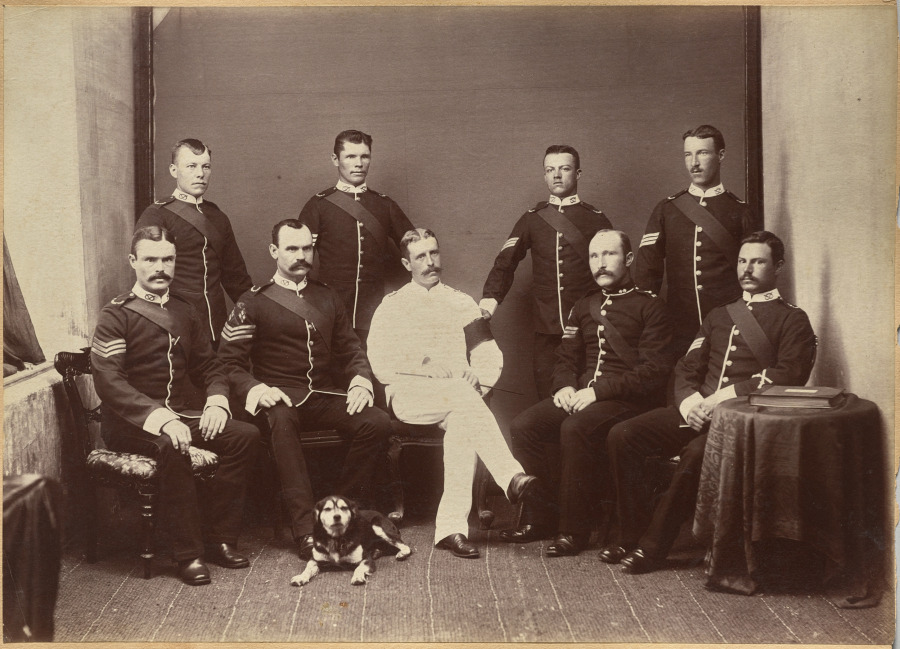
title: Captain Watkins and Non Com. officers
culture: India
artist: Raja Deen Dayal (Indian, 1844–1905)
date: c. 1882–87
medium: albumen print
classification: Photograph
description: These photographs are part of an album, now disassembled, of around 105 photographs taken in India between 1885 and summer 1887 that provide glimpses into the lives of the British colonial elite and royal and upper-class Indians. The museum holds another group of 37 pictures from this album (2016.266), which was probably commissioned by a British civil servant visiting or working in India around 1888 as a personal souvenir of his experiences there.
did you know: Raja Deen Dayal is regarded now, and was considered during his lifetime, to be India’s most important 19th-century photographer.